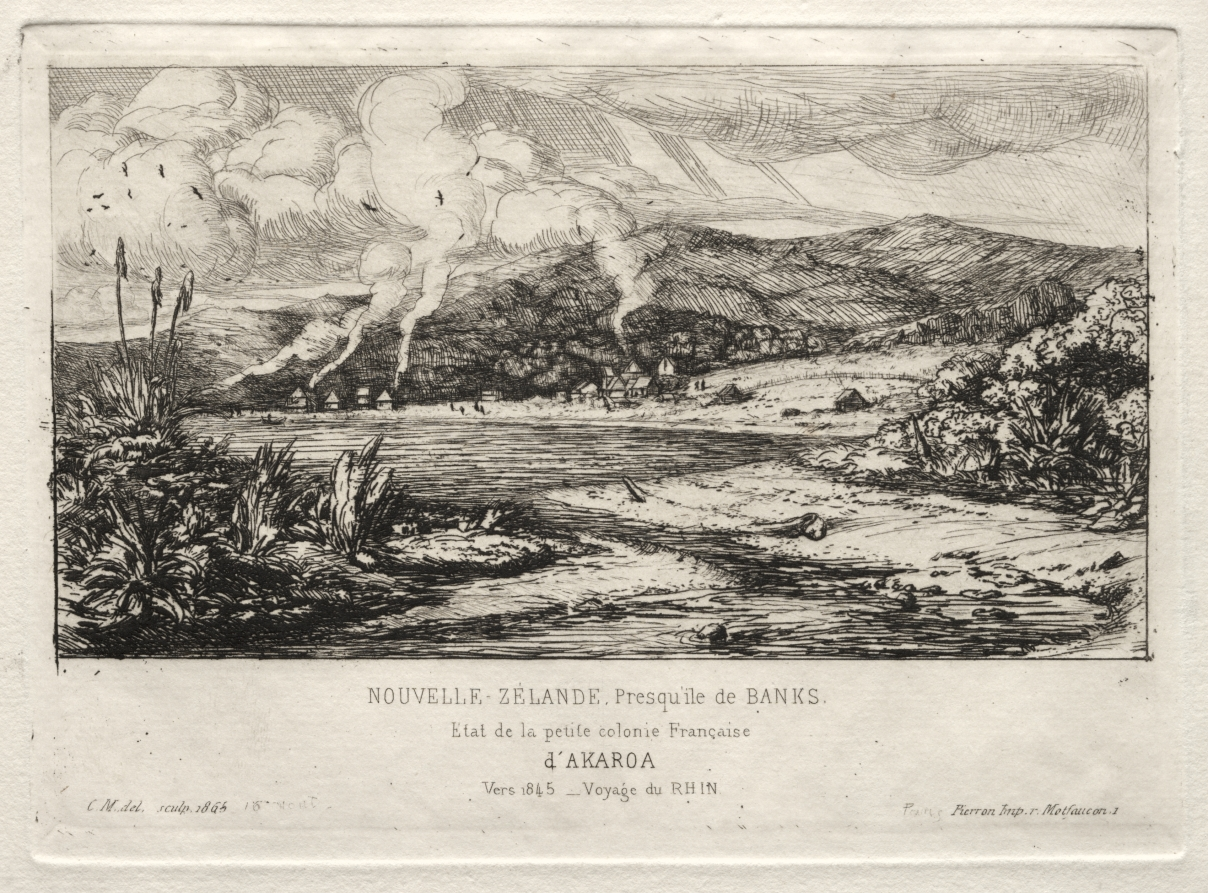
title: The Little French Colony at Akaroa, 1845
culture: France, 19th century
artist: Charles Meryon (French, 1821–1868)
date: 1865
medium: etching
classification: Print